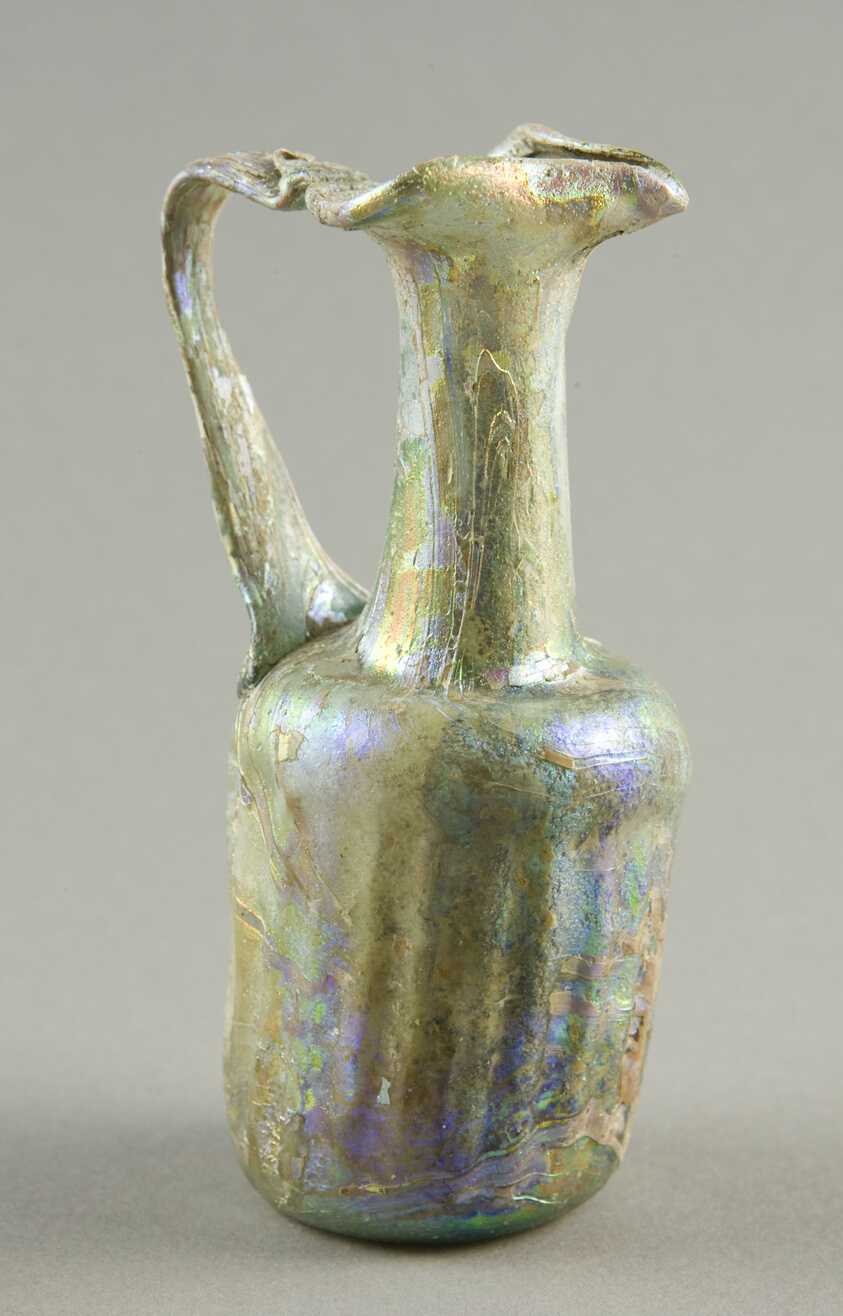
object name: Vessel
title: Pitcher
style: ancient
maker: Ancient Mediterranean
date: 2nd-5th century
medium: Glass, blown technique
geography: Mediterranean Region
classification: glass; vessel; ancient art